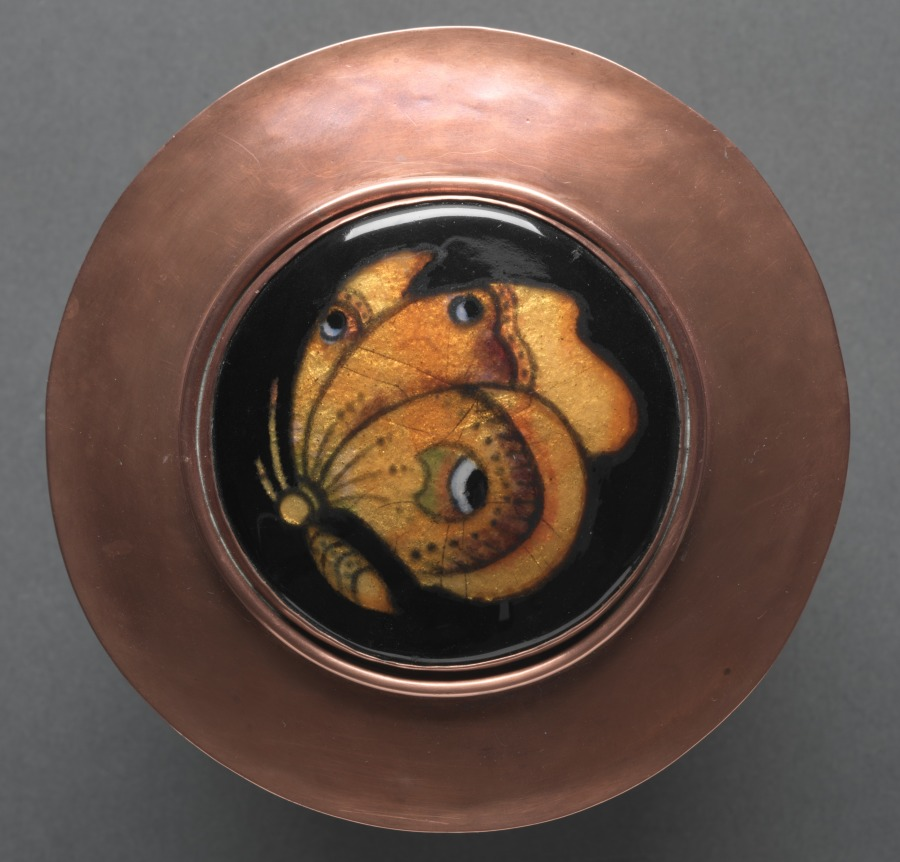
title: Covered Bowl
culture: America, Ohio, Cleveland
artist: Kenneth F. Bates (American, Cleveland, 1904–1994)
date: 1927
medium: copper and enamel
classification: Enamel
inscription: incised on bottom: "Kenneth F. Bates 1927."